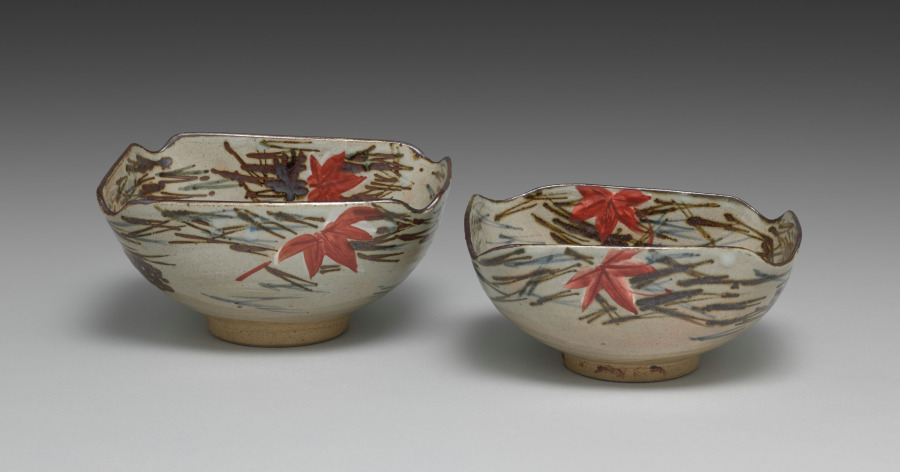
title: Nesting Dishes with Scattered Pine Needles and Maple Leaves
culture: Japan, Edo period (1615–1868)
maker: Seifū Yohei I (Japanese, 1801–1861)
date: 1861–78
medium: Pair of dishes; stoneware with underglaze blue, iron oxide, slip, and crackled glaze, and overglaze color enamel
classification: Ceramic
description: Seifū Yohei I made both blue and white porcelains after Ming dynasty (1368–1644) Chinese wares fired in the kilns at Jingdezhen for export. He also made colorful stoneware in the style of his teacher, Nin’ami Dōhachi (Takahashi Dōhachi II) (1783–1855).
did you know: The combination of the blue and brown for the needles imparts a sense of depth to the design, with the blue needles apparently at a greater distance.